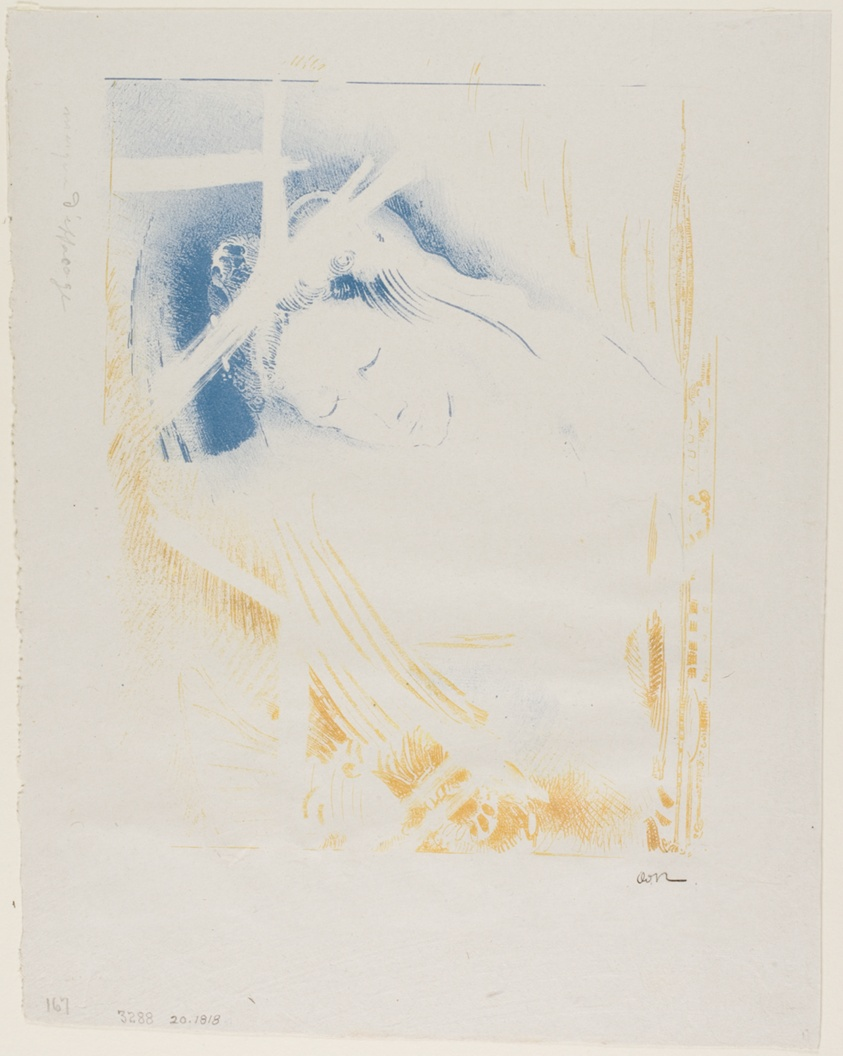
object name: Print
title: The Shulamite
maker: Odilon Redon (French, 1840-1916)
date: 1897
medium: Lithograph printed in blue and yellow-orange on heavy light gray chine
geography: France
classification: lithograph; print; prints and drawing; paper